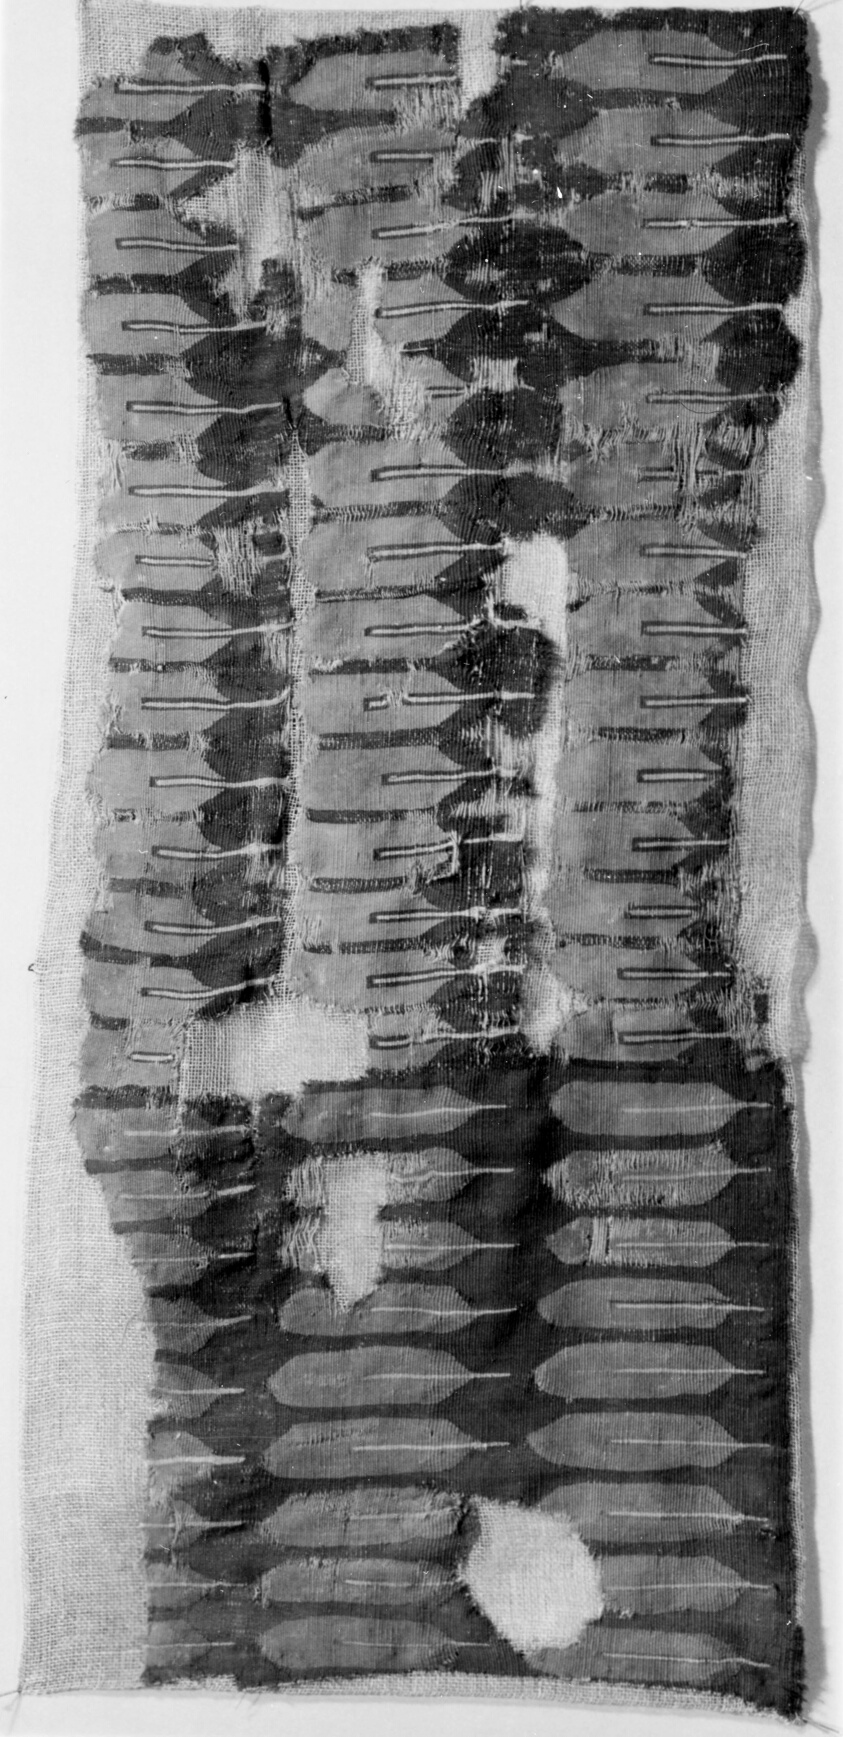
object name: Costume and Accessories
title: Tunic Fragment (?)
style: inca, late intermediate period, Pre-Columbian, americas, andean, andes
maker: Inca or provincial Inca; Peru, Possibly south coast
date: AD. 1476/1532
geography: Peru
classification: textile; weaving; costume; dress (garment); clothing